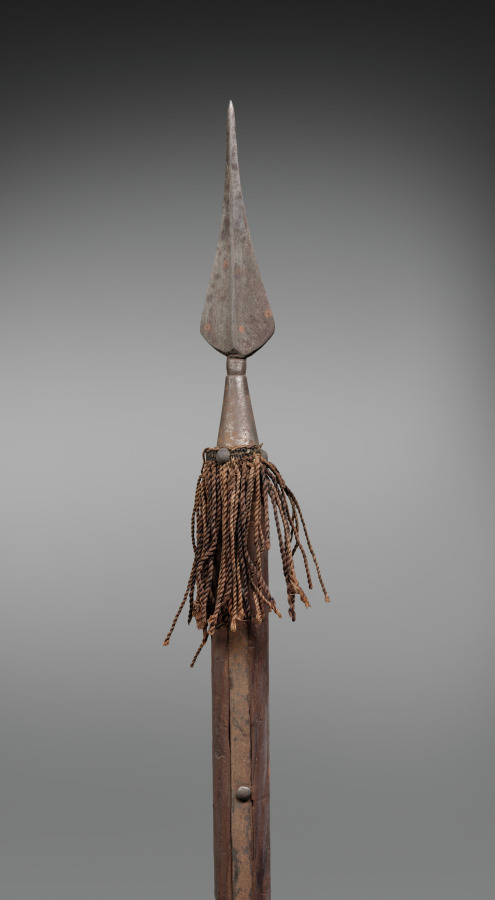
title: Pole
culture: Spain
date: 1700s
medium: wood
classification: Arms and Armor